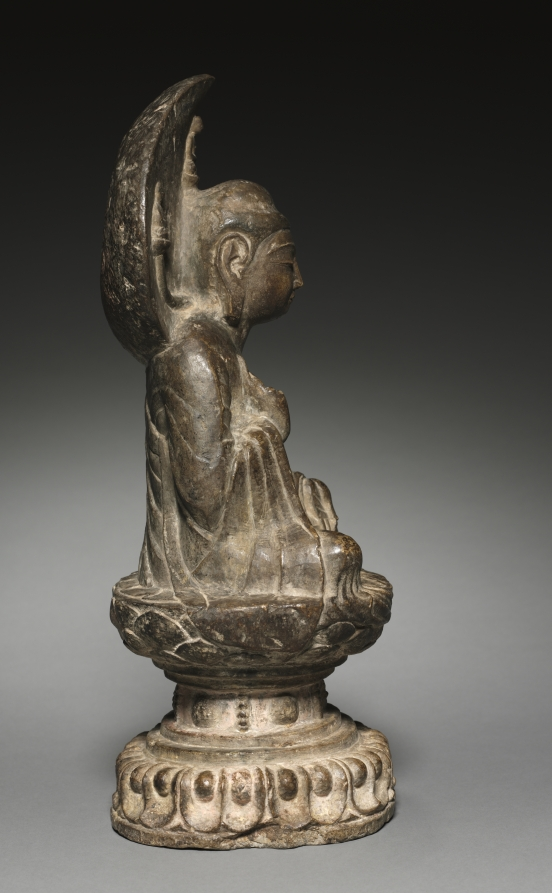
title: Amida Buddha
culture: China, Sui dynasty (581-618)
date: 581–618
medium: limestone with traces of polychromy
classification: Sculpture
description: The leaf-shaped halo of this seated Buddha bears the rare, unusual icon of the three nirmana Buddhas, which represents a symbolic homage of the Buddhas of the past, the present, and the future—manifestations of the Buddha in infinite time and space. Another interpretation is that the three figures without halos represent souls reborn in the Western Paradise thanks to Amida Buddha's divine intervention.